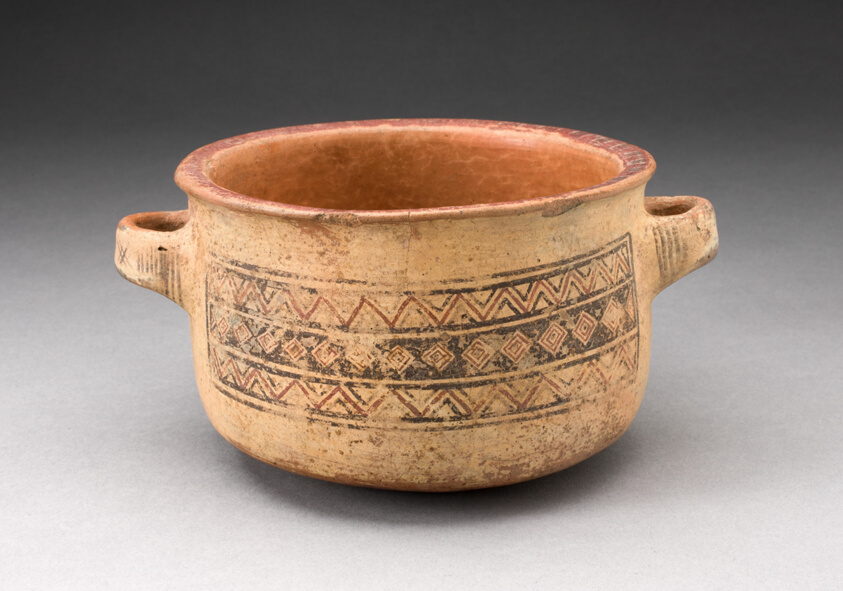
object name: Vessel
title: Minature Handled Bowl with Textile-like Design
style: inca, late intermediate period, Pre-Columbian, americas, Arts of the Americas, andean, andes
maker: Inca (South coast or southern highlands, Peru)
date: 1450–1532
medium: Ceramic and pigment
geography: Southern Peru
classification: bowl; earthenware; ceramics; vessel; art of the americas